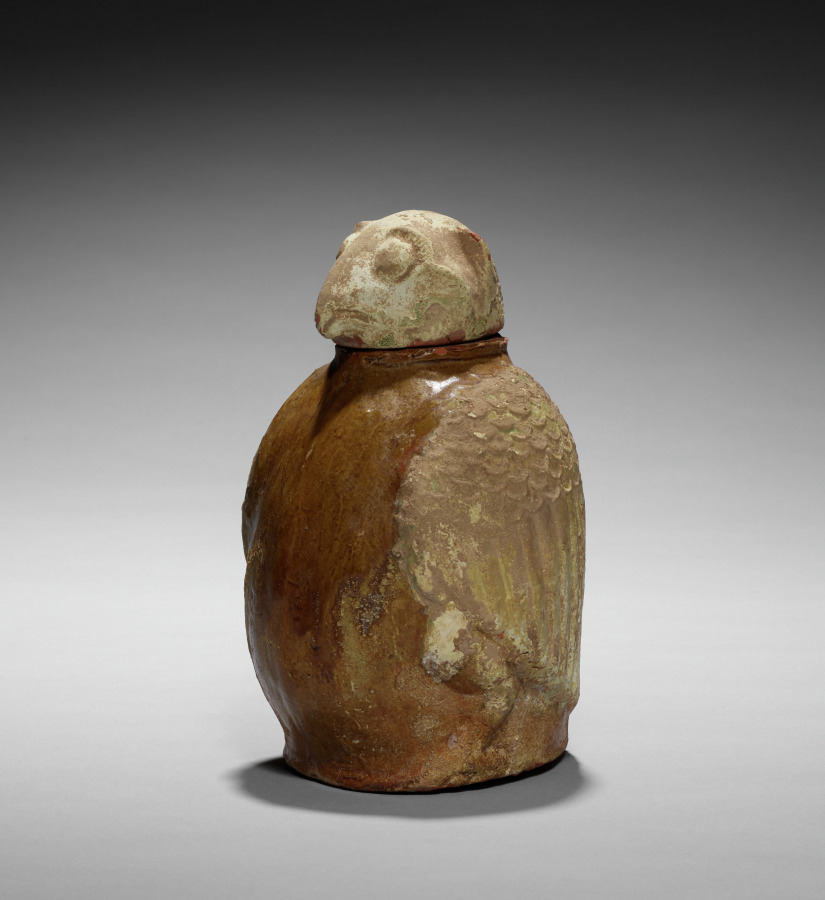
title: Owl-shaped Jar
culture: China, Henan province, Western Han dynasty (206 BCE–8 CE)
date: 206 BCE–9 CE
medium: Amber-brown glazed low-fired pottery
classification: Ceramic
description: Pottery vessels in the shape of owls were made since Neolithic times and throughout the Bronze age. These jars in the form of vigilant owls may have provided a tomb occupant with grain in the afterlife. However, the meaning of these mysterious birds and the association of the owl motif with burial sites in China is not fully understood.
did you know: The jar cover is modeled in the shape of an owl's head.